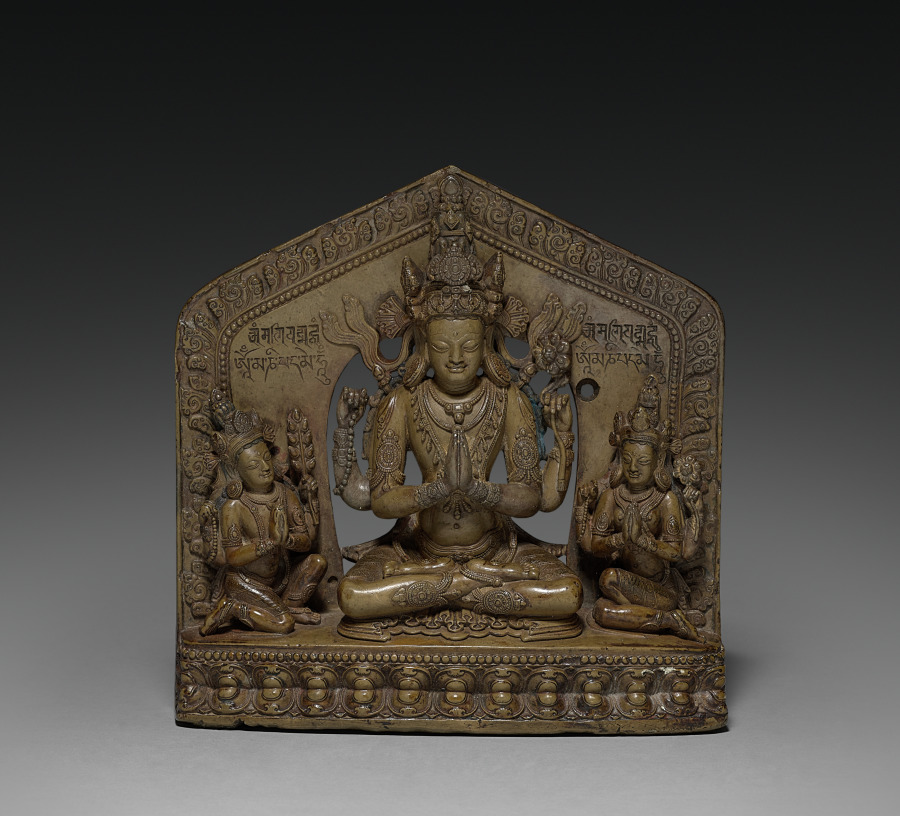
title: Stele with Sadaksari-Lokesvara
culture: Tibet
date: c. 1200s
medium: Kaolin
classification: Sculpture